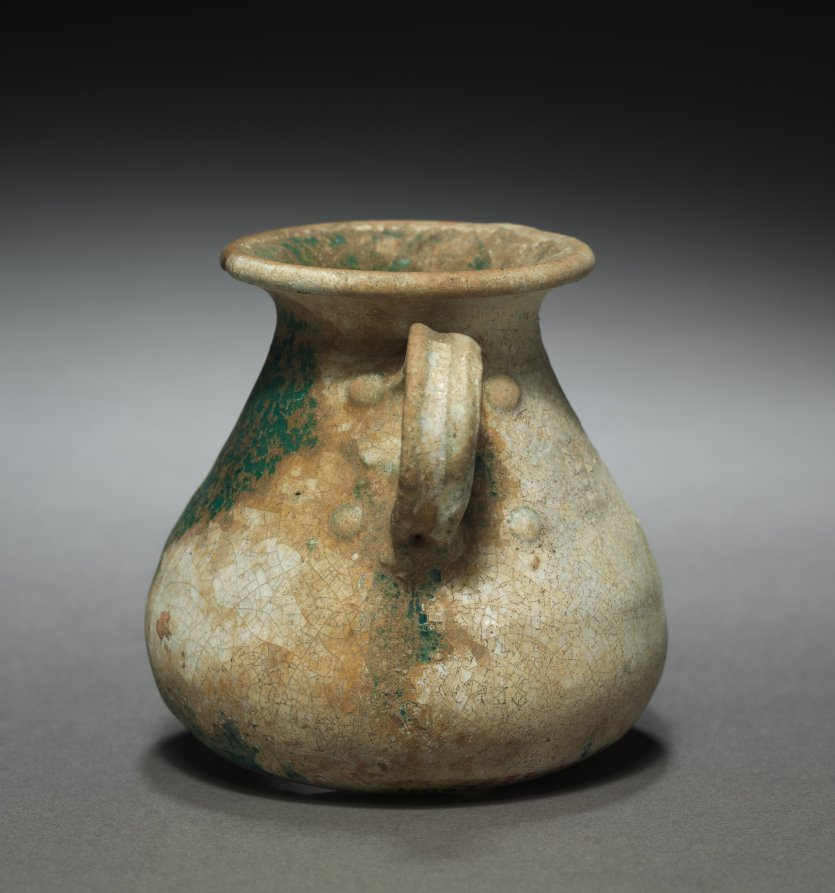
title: Small Pitcher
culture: Parthian Empire (247 BCE–224 CE)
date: 1–200 CE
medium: terracotta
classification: Ceramic